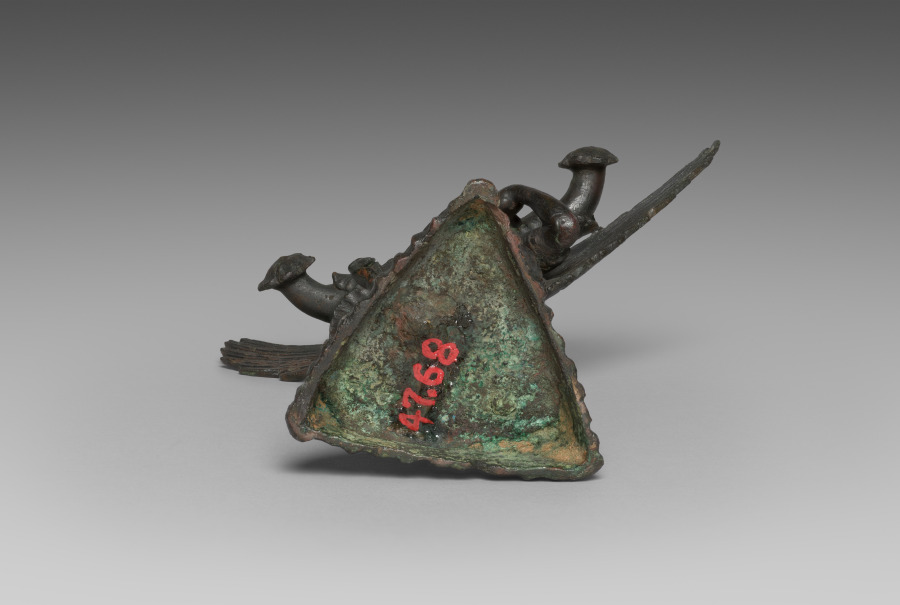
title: Patera Support: Lasa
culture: Etruscan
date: 300–175 BCE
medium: bronze with silver inlays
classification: Sculpture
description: Standing on a triangular base, this winged female figure twists her body while admiring herself in the small mirror held in her left hand. Nearly nude, she wears sandals as well as a leopard or panther skin and jewelry inlaid with silver. Above her head and wings, a small portion of a patera, or shallow offering dish, survives. Inscriptions identify similar winged female figures elsewhere in Etruscan art as Lasas, often together with Turan (an Etruscan goddess analogous to the Greek Aphrodite).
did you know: This elaborate figure served as a handle or support for a patera, a shallow dish.